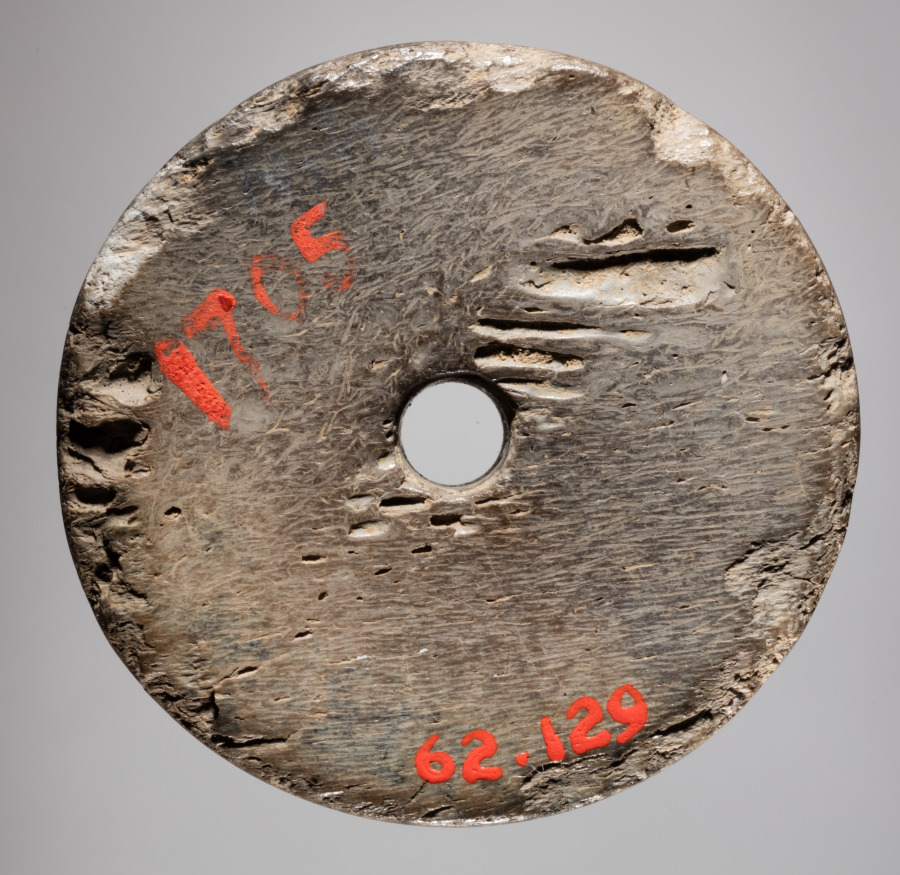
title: Spindle Whorl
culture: Iran, early Islamic period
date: 700s - 900s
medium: bone, incised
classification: Spindle Whorl